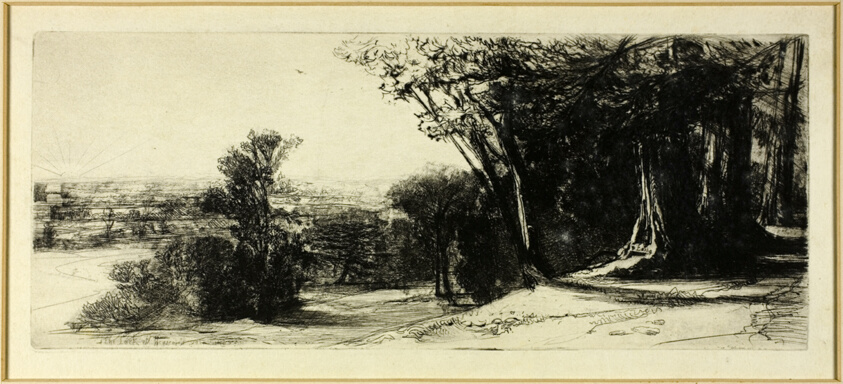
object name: Print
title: Early Morning, Richmond Park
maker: Francis Seymour Haden (English, 1818-1910)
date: 1859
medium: Etching and drypoint on ivory wove paper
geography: England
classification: etching; print; prints and drawing